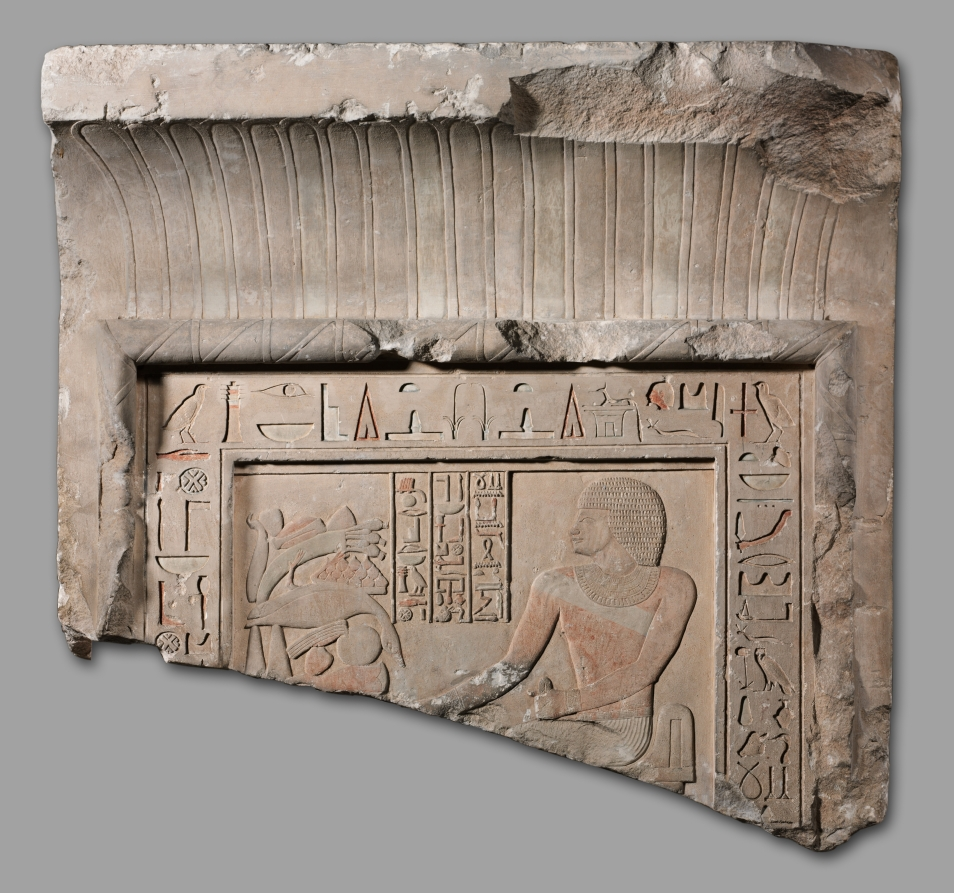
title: Stele of Shemai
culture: Egypt, Aswan, Qubbet el-Hawa, excavations of Lady William Cecil, 1904, "Cecil Tombs," no. 28, Middle Kingdom (2040–1648 BCE), Dynasty 12, probably reign of Senusret I (1971–1926 BCE)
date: c. 1960–1916 BCE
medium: painted limestone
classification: Funerary Equipment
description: Two techniques of relief carving are employed here: the scene of the deceased seated before a table of offerings and its accompanying inscriptions are in raised relief, while the border inscriptions are in sunk relief. The three columns of hieroglyphs in the center read: "The one honored before Osiris, lord of Busiris, the great god, lord of Abydos, that he [the god] may give invocation-offerings of bread and beer, oxen and fowl, travertine [vases] and clothing to the ka [vital spirit] of the chief of police, Shemai, vindicated."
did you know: This door-shaped stele honors a deceased chief of police named Shemai.